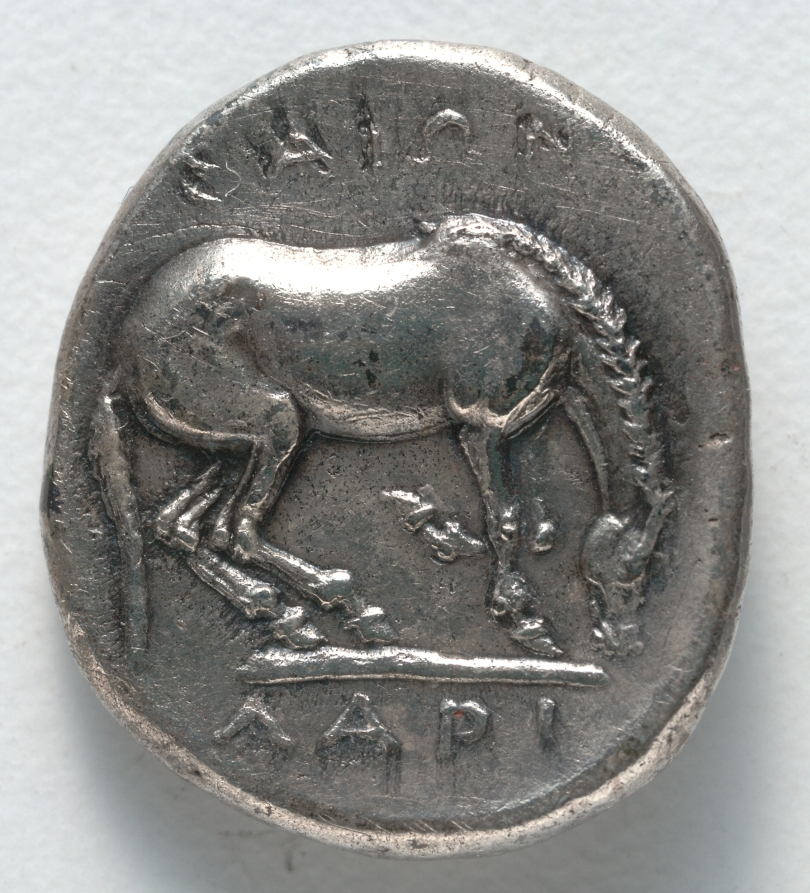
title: Drachm: Horse (reverse)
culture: Greek, minted at Larissa (Thessalia)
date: c. 375–320 BCE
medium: silver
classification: Coins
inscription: ΛΑΡΙ | ΣΑΙΩΝ